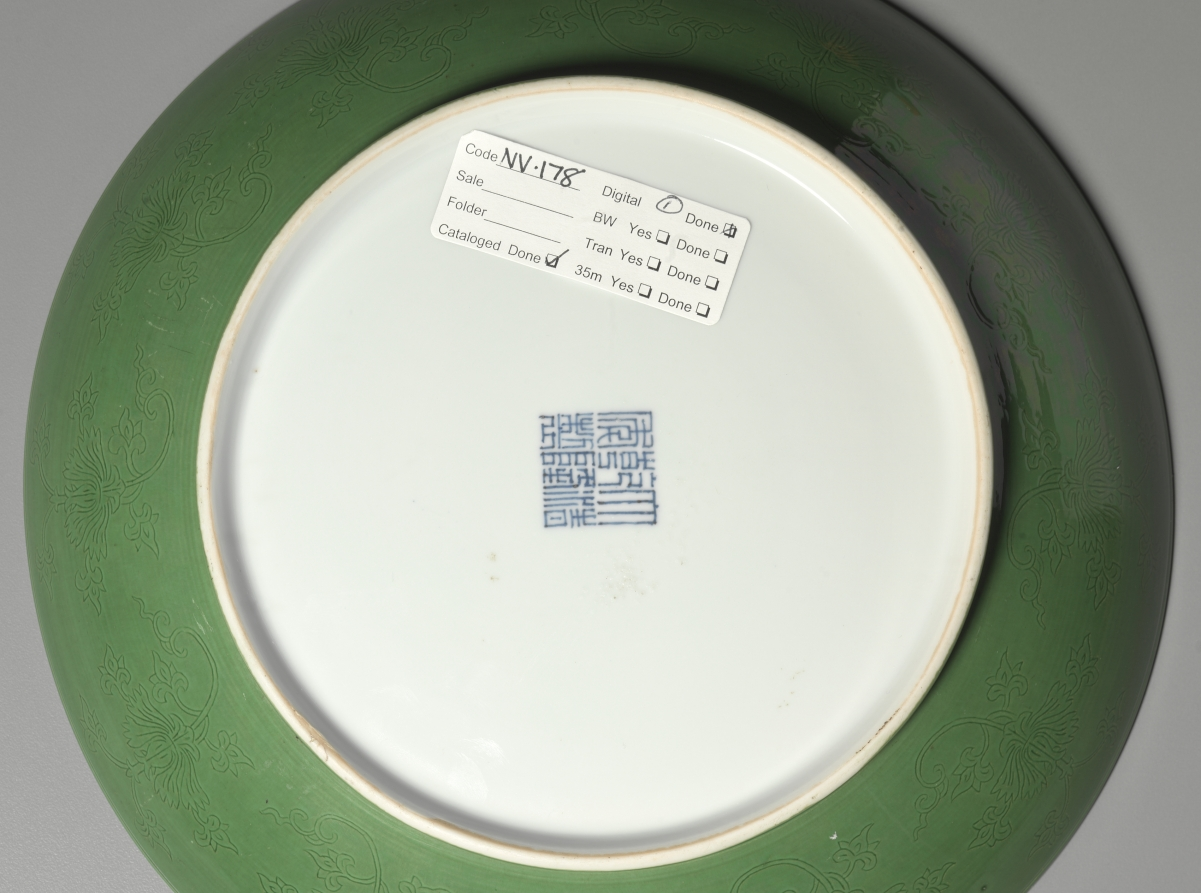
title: Dish with Green Glaze and Carved Floral Designs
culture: China, Qing dynasty (1644-1911), Qianlong mark and reign (1735-1795)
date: 1736–95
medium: glazed porcelain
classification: Ceramic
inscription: 大清乾隆年制